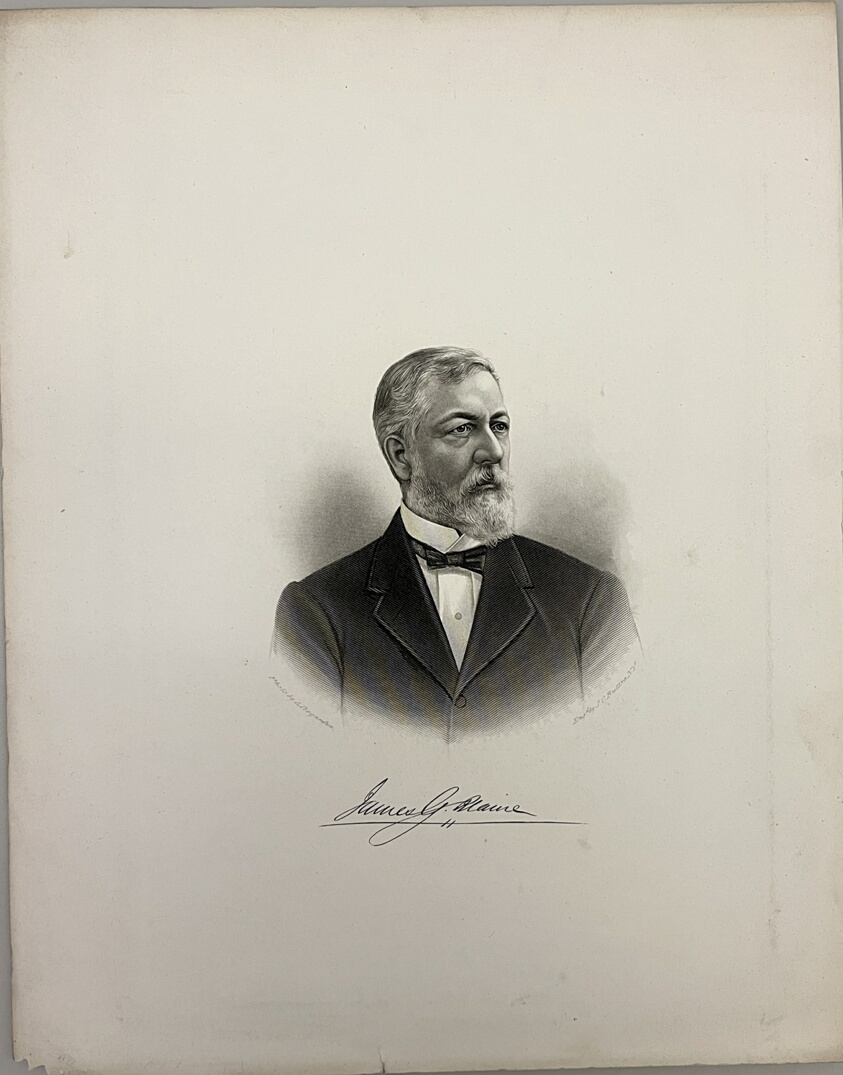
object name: Print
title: James G. Blaine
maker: John Chester Buttre (American, 1821-1893); after Abraham Bogardus (American, 1822-1908)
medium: Steel engraving on paper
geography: United States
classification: reproduction; print; prints and drawing